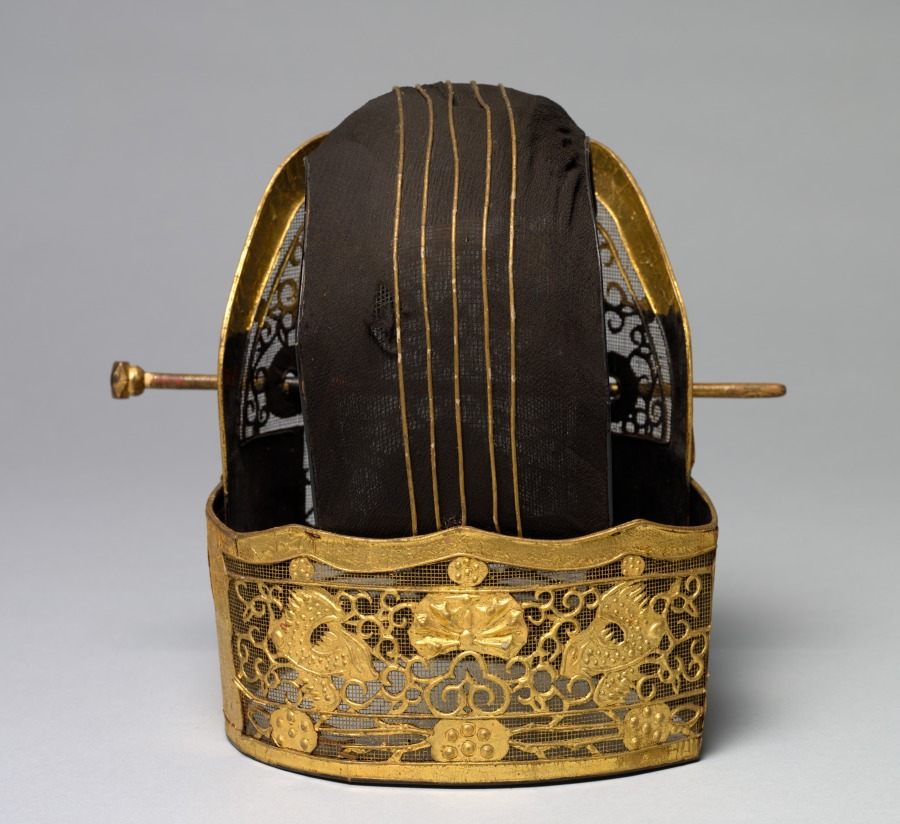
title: Crown for the Royal Ceremonial Costume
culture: Korea, Joseon dynasty (1392–1910)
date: late 1800s–early 1900s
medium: gilded paper, metal wire, and black silk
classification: Garment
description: This is a set of royal ceremonial robe and accessories worn by a high-ranking court official for attending special state ceremonies. The set consists of an inner coat, an outer coat, a skirt, a back apron, a crown, a pair of jade tassels, a tablet, and a belt.